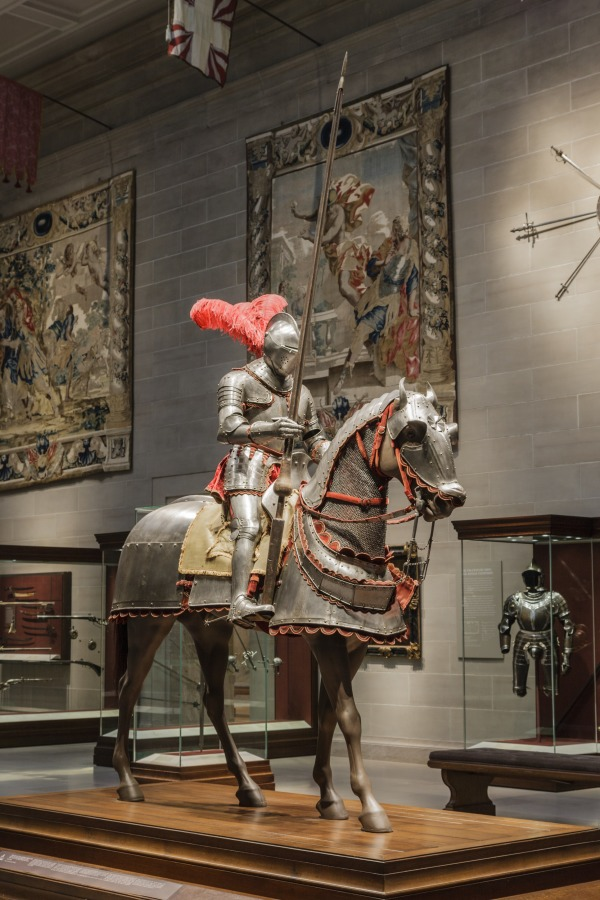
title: Armor for Man and Horse with Völs-Colonna Arms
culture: North Italy, 16th century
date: c. 1575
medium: steel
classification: Arms and Armor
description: A knight depended on his horse both as a weapon and a means of defense. He therefore had to take great care to protect his charger. From the 1100s on, knights first covered their steeds in trappings of fabric and later of mail. By around 1400, full steel plate armor for horses was complete. It is possible that this armor made for both man and horse originally belonged to a "garniture," an armor with multiple customized exchange elements that could convert the basic suit to various field and sporting uses. With different pieces of the garniture attached, this suit could have been worn either in battle or in various tournament games. The total combined weight of both the man's and horse's armor is 114 pounds. The etched decoration of this armor is of a type that became fashionable in northern Italy during the late 1500s. It consists of ornamental bands of etched figures, animals, portrait busts, and armor trophies. In addition, a coat of arms is represented seven times in different places—the center of the breastplate and blackplate, the front and back of each pauldron (shoulder defense), and the center of the peytral (horse's breastplate). The coat of arms is that of the Colonna family quartered with another, still unidentified family. It probably belonged to an unknown member of the Völs-Colonna family from the South Tyrol, now part of northern Italy.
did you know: The Vols-Colonna family crest is found seven times in prominent locations on this armor set for horse and rider.